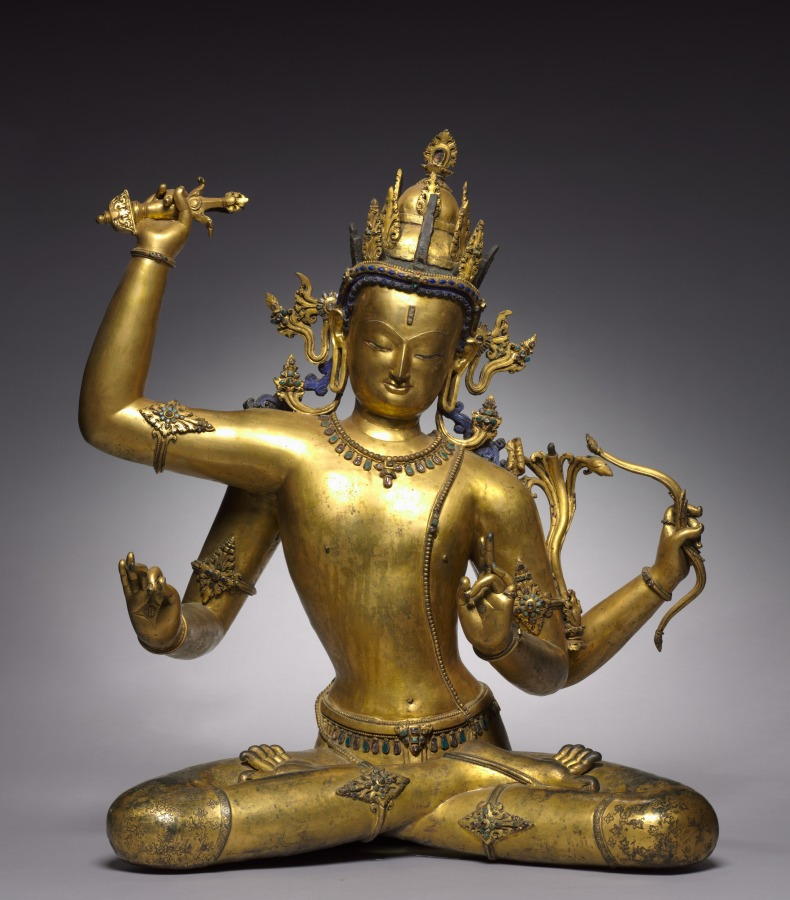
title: Bodhisattva of Wisdom (Manjushri)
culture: Nepal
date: 1400s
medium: Gilt bronze with precious and semiprecious stones, gum tempera, and cold gold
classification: Sculpture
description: This image depicts one of the main bodhisattvas, beings only one stage away from full enlightenment. Because the historical Buddha was a prince prior to his renunciation and life as a wandering ascetic, bodhisattvas are depicted as royal princes. This example has the sharp features, sweet expression, and crisp details characteristic of images made in Nepal during the 1400s. In his upraised right hand Manjushri holds the hilt of a sword that, like wisdom itself, metaphorically cuts through and defeats ignorance. His lower, rear left hand grasps a bow, once probably strung with a wire. Also missing is the arrow that he likely held in his lowered right hand. Arrows were often symbols for mantras, or strings of syllables thought to have the power to focus the mind and work like missiles to destroy negativity and affliction. The gesture of his lowered left hand indicates the transmission of Buddhist teachings. The lotus stem that rises at the left elbows originally held a book of sutras. This figure is in the yogic posture of meditation with the big toe flexed in concentration. Yoga is of central importance in tantric Buddhism, because high-level practitioners are able to discipline the body to such an extent that the mind can also be controlled.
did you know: The bodhisattva's short breeches are patterned in spiraling floral forms incised into the metal.